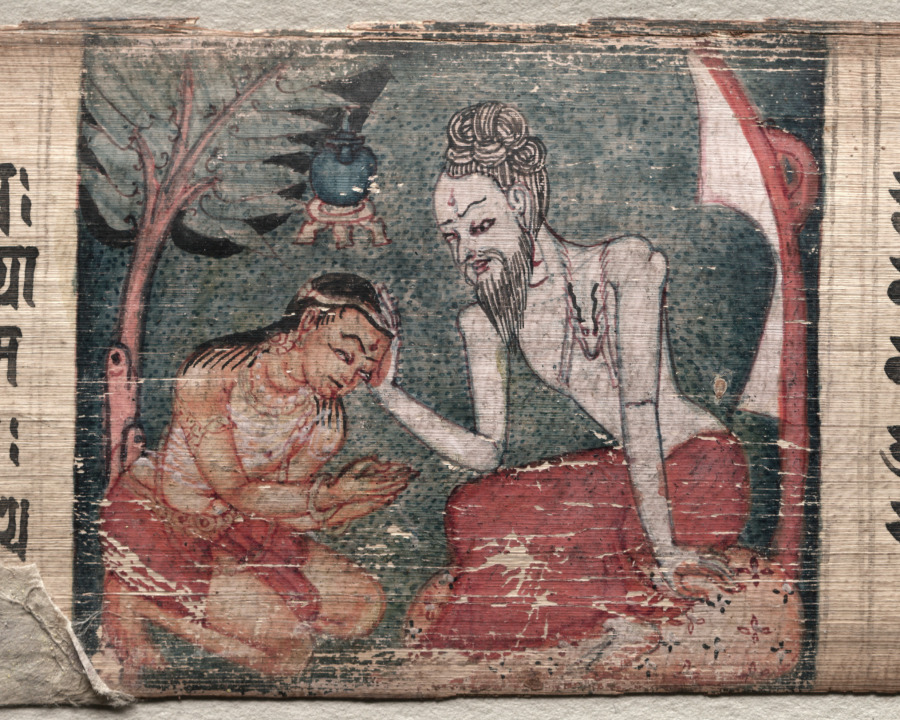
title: Sudhana and the rishi Bhishmottaranirgosha, folio 94 (recto) from a Gandavyuha-sutra (Scripture of the Supreme Array)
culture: Nepal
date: 1000–1100s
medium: gum tempera and ink on palm leaves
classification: Painting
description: The enlightened sage (rishi) places his hand on the pilgrim Sudhana's head and transmits his teachings through a trance-like vision. The name of his teaching is "Undefeated Banner," and the artist has painted an identifying banner behind him, at the right edge. This is one of the few paintings of this manuscript that explicitly relates to the text.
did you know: The sage has dreadlocks and wears a black antelope skin over his shoulder.